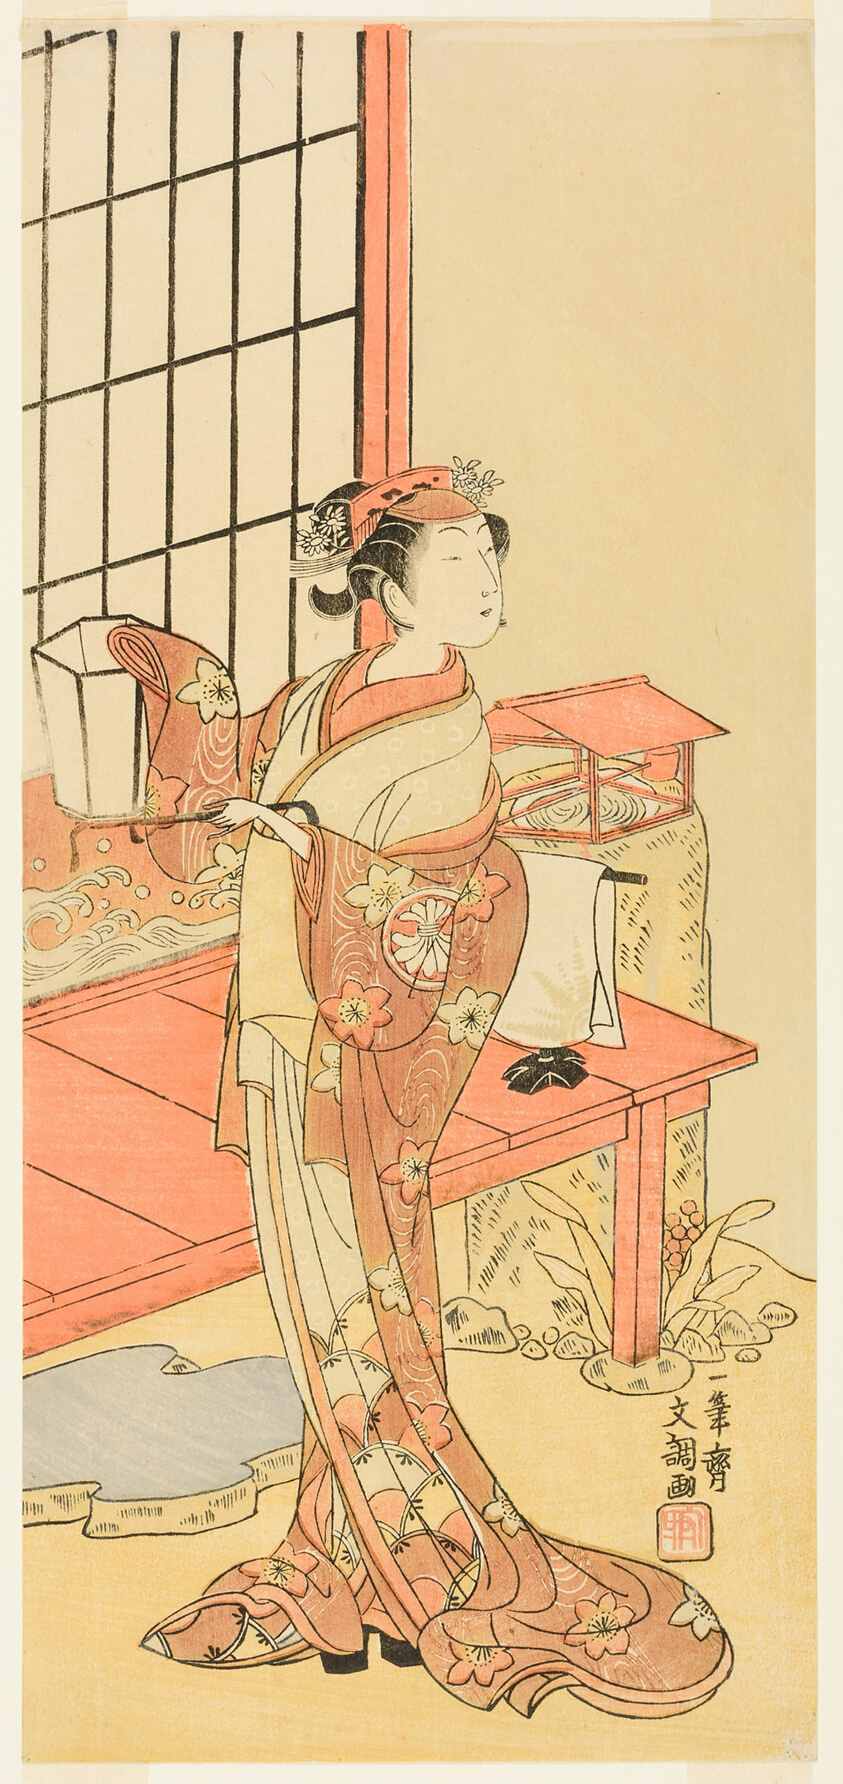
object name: Print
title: The Actor Segawa Kikunojo II, Possibly as Princess Ayaori in the Play Ima o Sakari Suehiro Genji (The Genji Clan Now at Its Zenith), Performed at the Nakamura Theater from the First Day of the Eleventh Month, 1768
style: Japanese (culture or style)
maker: Ippitsusai Buncho (Japanese, active c. 1755-90)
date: c. 1768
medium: Color woodblock print; hosoban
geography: Japan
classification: woodblock print; print; asian art